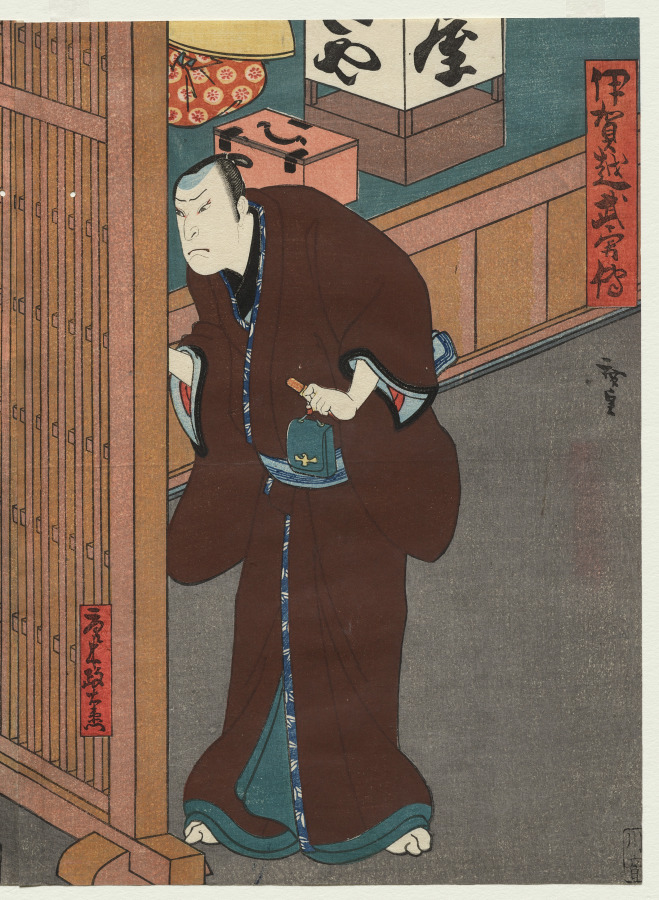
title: Mimasu Daigoro IV as Yamada Takakage (From the series A Tale of Valor at Iga Pass)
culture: Japan, Edo period (1615–1868)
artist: Gosōtei Hirosada (Japanese)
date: c. 1850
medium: color woodblock print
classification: Print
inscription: Signature: Hirosada